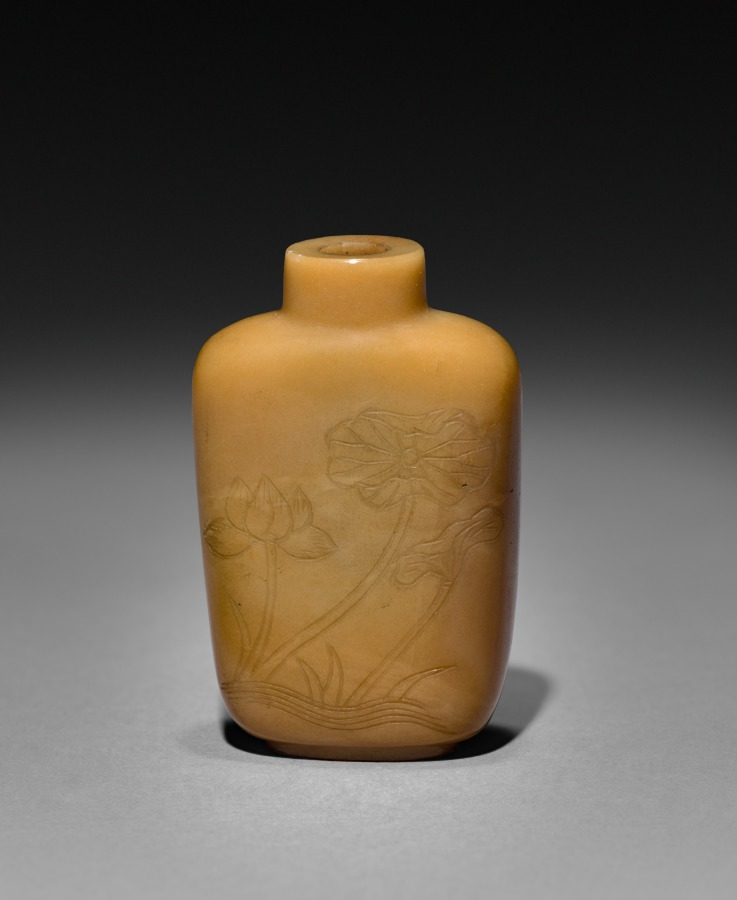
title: Snuff Bottle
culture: China, Qing dynasty (1644-1911)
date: 1800s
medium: glass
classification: Glass